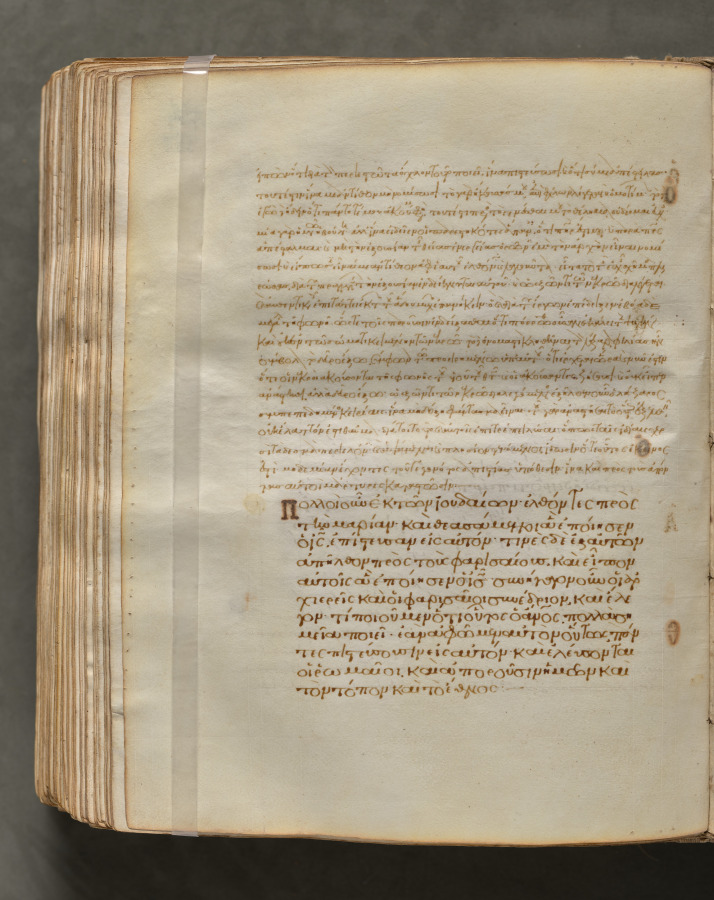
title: Text, folio 380 (verso), from a Gospel Book with Commentaries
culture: Byzantium, Constantinople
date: c. 1000–1100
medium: ink, tempera, and gold on vellum; leather binding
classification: Bound Volume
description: Each of the four gospels in this book opens on a page with brilliantly illuminated borders depicting the author of the text as well as birds—principally peacocks, symbols of the immortality of the soul—and fountains, representing the fountain of life and the salvation of the soul. This volume consists of 428 leaves with texts in Greek. Its level of sophistication suggests that it was probably written and decorated in a monastery in Constantinople.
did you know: Gospel books were carried in procession through Byzantine churches.